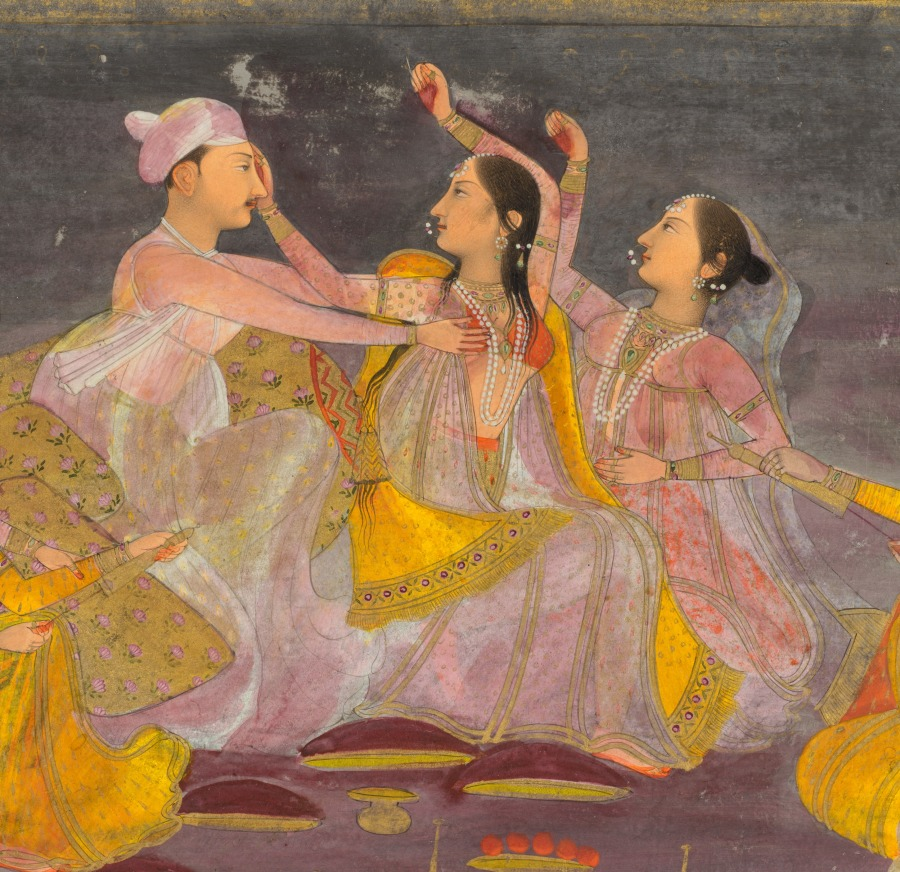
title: A prince celebrating Holi with palace women on a terrace at night (recto)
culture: India, Farrukhabad, Mughal, 18th century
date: c. 1760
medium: Gum tempera and gold on paper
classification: Painting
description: Images of pleasure and play abound in Mughal paintings of the latter half of the 1700s. Under a full moon reflected off a river and by the light of candles, a prince celebrates the spring festival of Holi with a group of palace women. Holi festivities include the boisterous tradition of smearing one another with colored powders—shown heaped on dishes—or shooting colored liquid using plunger guns.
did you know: Pairs of ducks swim under the full moon on the night of the vernal equinox.